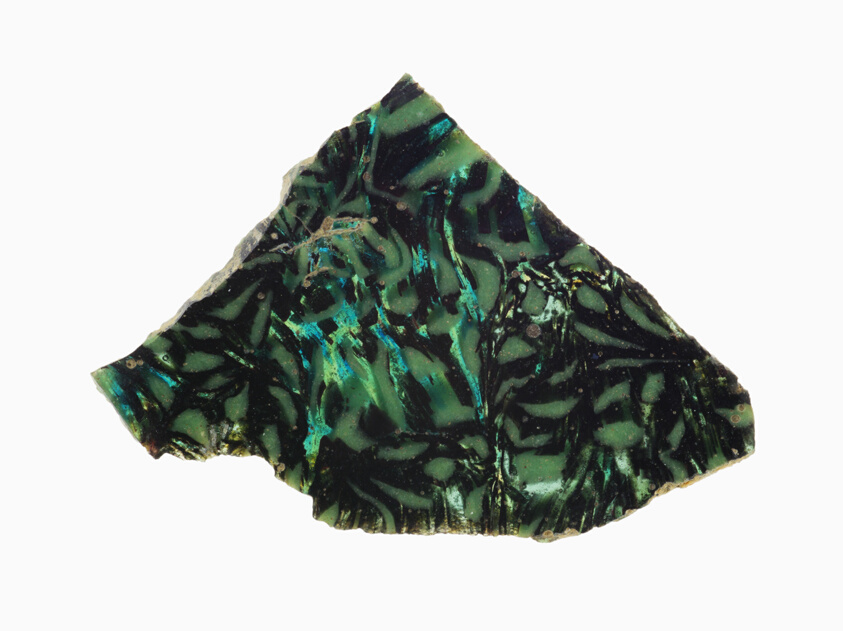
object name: Decorative Arts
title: Fragment of a Wall Revetment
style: roman (ancient, style or period), ancient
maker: Roman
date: 1st century BCE–1st century CE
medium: Glass, mosaic glass technique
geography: Roman Empire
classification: fragment; decorative arts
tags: decoration